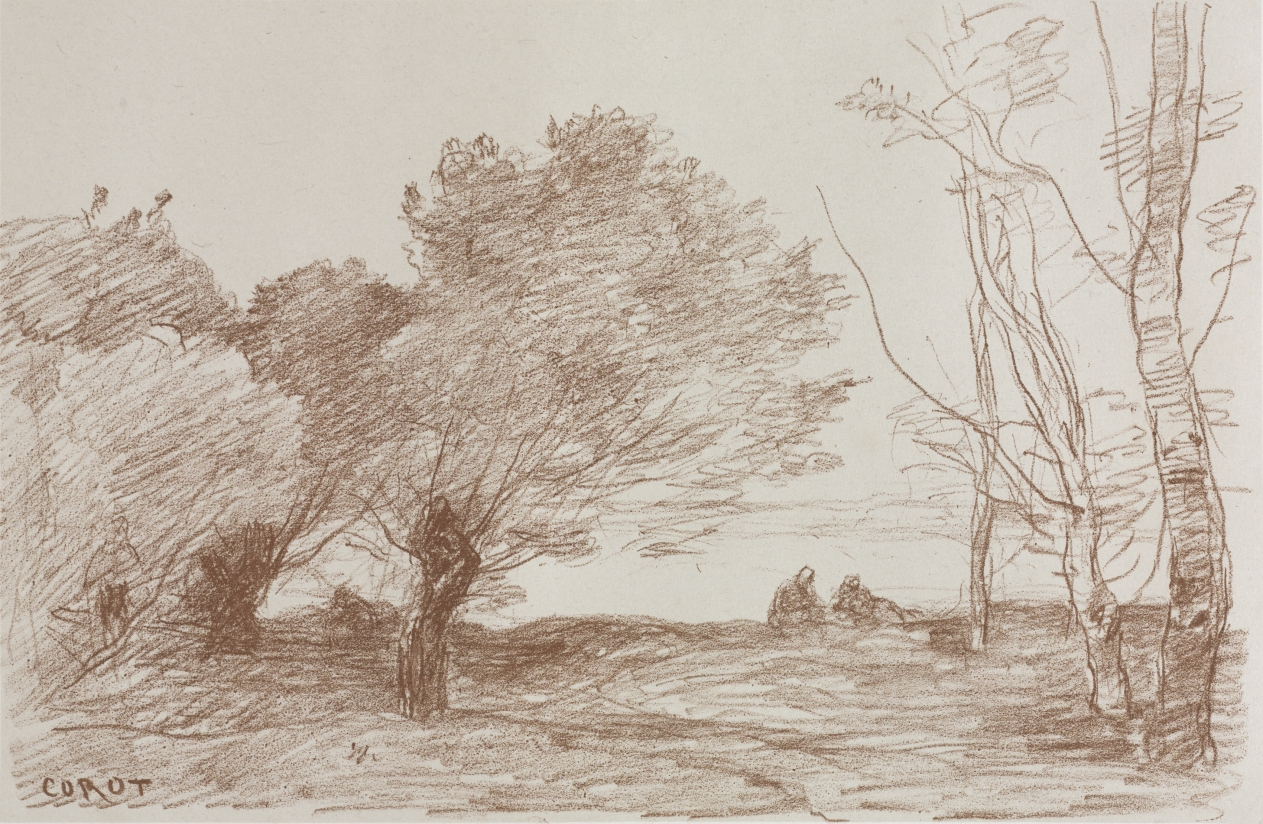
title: Willows and Poplars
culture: France, 19th century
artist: Jean Baptiste Camille Corot (French, 1796–1875)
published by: Robaut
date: 1871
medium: lithograph with chine collé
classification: Print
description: Willows and Poplars summarizes Corot’s aesthetic, combining elements from the classical tradition from which he evolved with the hazy poetic character of his mature style. The dream of Arcadia is suggested by the two figures, utterly removed from time and place, reclining under the grove of trees. The line is so relaxed that it draws the beholder into a contemplative state of reverie.